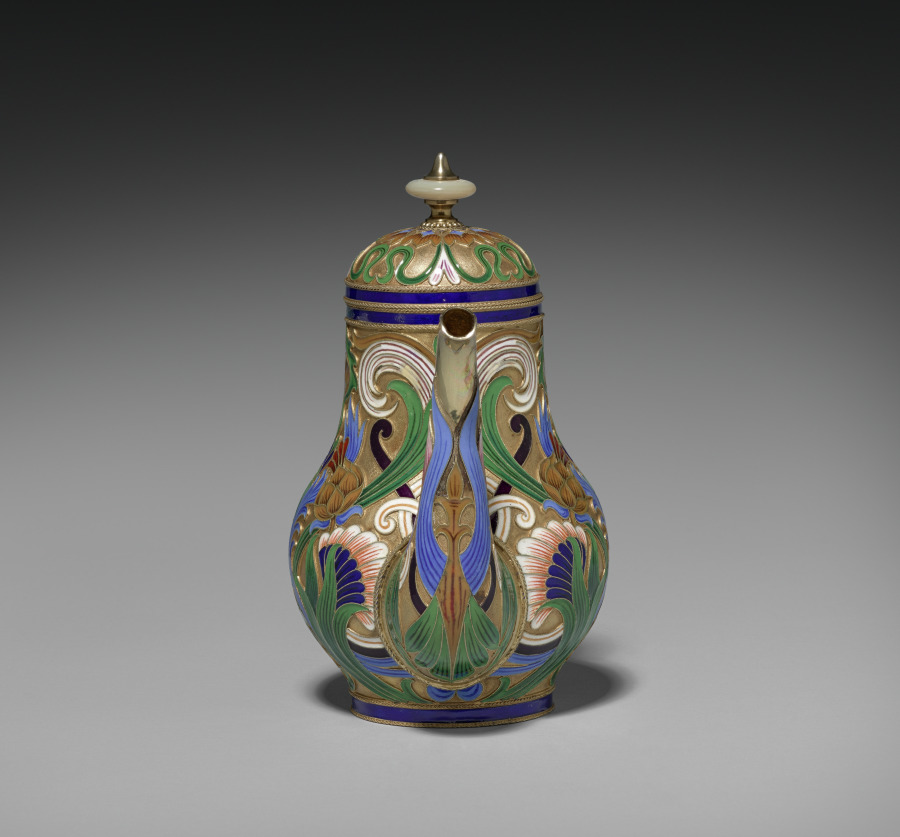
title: Covered Hot Water Pot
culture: Russia, St. Petersburg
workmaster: attributed to Feodor Ivanovich Rückert (Russian, 1840–1917)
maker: House of Fabergé (Russian, 1842–1918)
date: 1887–96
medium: silver gilt, opaque cloisonné enamel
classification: Miscellaneous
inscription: 88, St. George [assay mark for Moscow, 1882-1896]; C. Fabergé (in Cyrillic); double-headed eagle [imperial warrant]; 88; initials of Carl Fabergé (in Cyrillic).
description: Fabergé’s craftsmen in Moscow, especially under the watchful eye of workmaster Feodor Rückert, became known for their work in the pan-Slavic or neo-Russian style, hearkening back to 17th-century motifs of Russian folk art. Often on rather conventional shapes, Rückert and his silversmiths created an explosion of color, achieved through the historic technique of cloisonné enamel in which tiny metal lines are soldered to the surface then filled with glass powders in various colors and fired to create a high gloss finish. The result is a spectacular evocation of the 17th-century originals. Far from mere copies, however, Rückert's designs, such as this tea service, employ naturalistic or abstract motifs in a thoroughly modern adaptation of a remarkable earlier period of Russian art and decoration.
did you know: This covered hot water pot is part of a larger tea set.